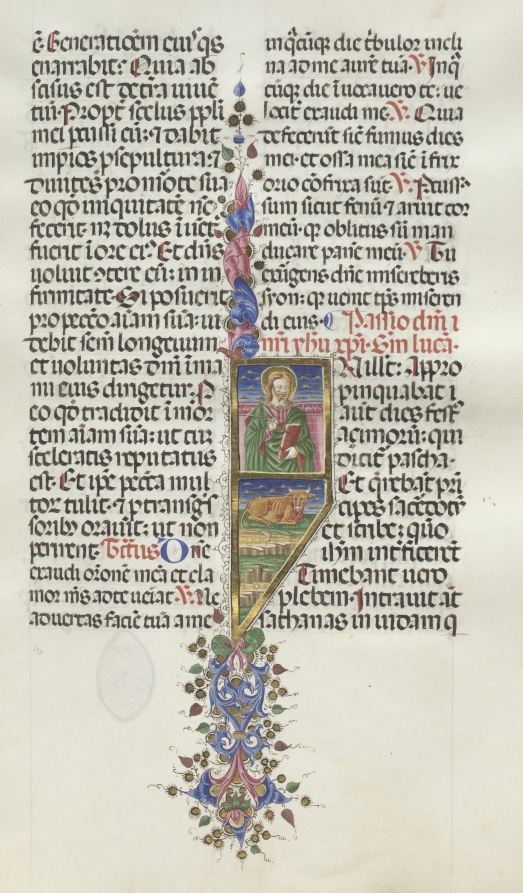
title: Missale: Fol. 131: Saint Luke with Bull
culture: Italy, Perugia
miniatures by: Bartolommeo Caporali (Italian, c. 1420–1503)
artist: assisted by Giapeco Caporali (Italian, d. 1478)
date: 1469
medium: ink, tempera and burnished gold on vellum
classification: Bound Volume